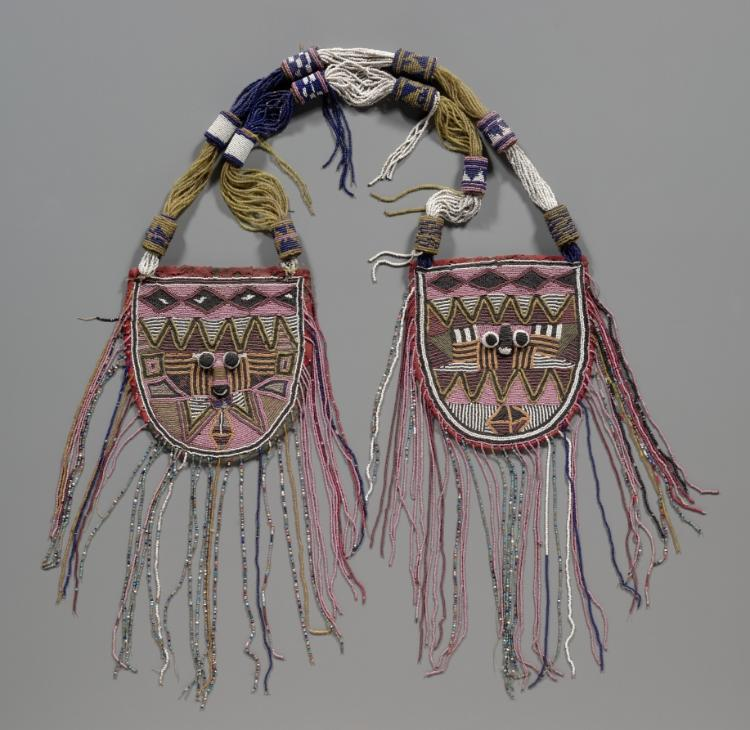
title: Ifá diviner's necklace (òdìgbà Ifá)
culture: Africa, West Africa, Nigeria, Yorùbá-style maker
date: 1900s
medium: Cloth, glass beads, cardboard, cotton, probably wool, and wood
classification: Implements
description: The use of colorful glass beads adds luster to the divination session and underlines the high status diviners enjoy in Yorùbá society. Like kings, diviners derive their authority from the otherworld, òrún. A beaded necklace with two beaded pouches is an accessory carried by the itinerant Yorùbá diviner. Substances sewn into the miniature bags protect the diviner and ensure his power.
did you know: Look closely at the minuscule beads used to make the complex patterns of this multicolored necklace containing two pouches with thin strands that are connected by rope-like cords. A Yoruba diviner would have communicated with the spirit world while wearing this accessory.